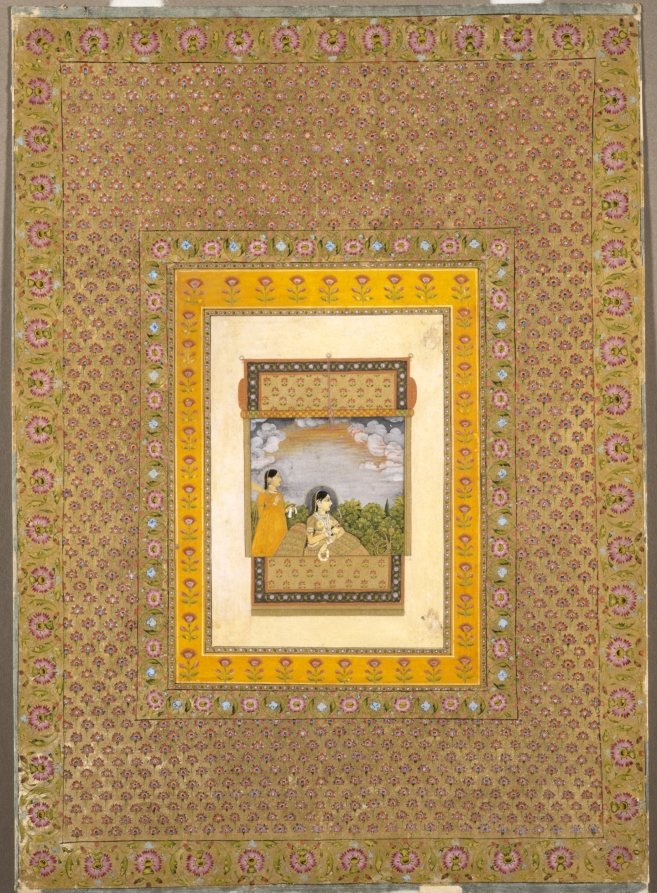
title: Princess and attendant in trompe l’oeil window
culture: Mughal India, Uttar Pradesh, Lucknow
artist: Aqil Khan (Indian, active mid-1700s)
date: c. 1765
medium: Gum tempera, ink, and gold on paper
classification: Painting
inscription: 'amal 'Aqil Khān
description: A golden window shade has been rolled up to reveal a princess seated on a terrace. The carpet draped over the sill echoes that of the balcony rail where royals would show themselves to the public. Rather than taking the view of an outsider, the viewer looks from inside the palace out to the women and the wooded landscape beyond. During the mid-1600s, the Mughal court introduced a preference for the patterns on carpets and textiles: flowering plants on a plain ground. This influential fashion derived from their appreciation of European botanical studies that merchants and diplomats brought to India.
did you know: Unlike in portraits of the emperor, women sit on the outside of the royal window.